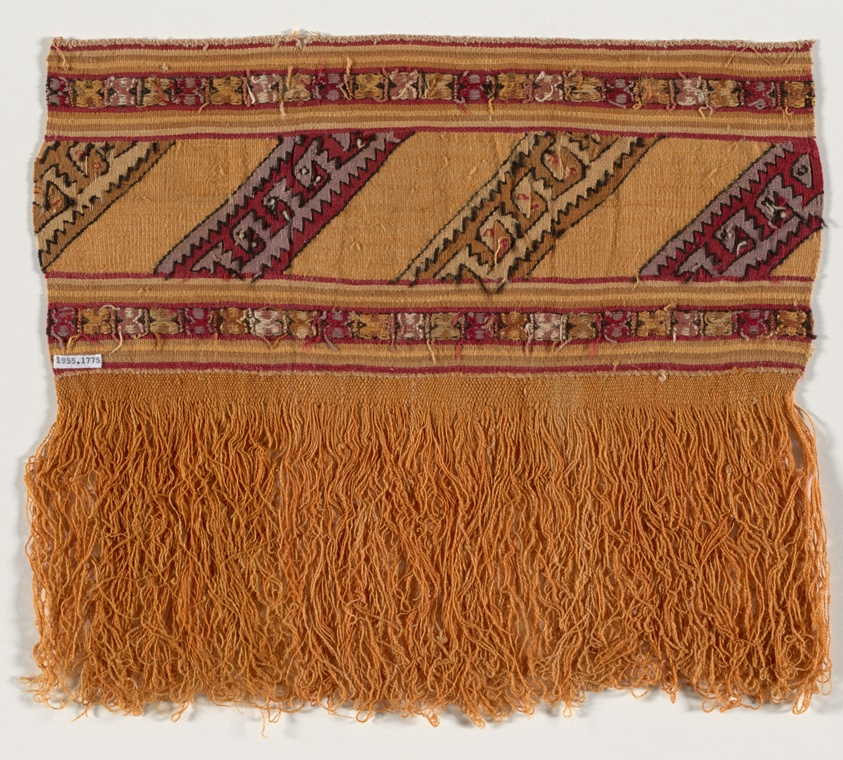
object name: Textile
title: Border Fragment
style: chancay, inca, late intermediate period, Pre-Columbian, americas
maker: Chancay (Central coast, Peru)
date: A.D. 1000/1476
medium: Cotton and wool (camelid), bands of plain weave, slit tapestry weave with wrapping outlining wefts, and three-color complementary weft weave; edged with plain weave extended weft loop fringe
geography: Peru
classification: weaving; textile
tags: insects, birds, lines, scorpions, stepped motif